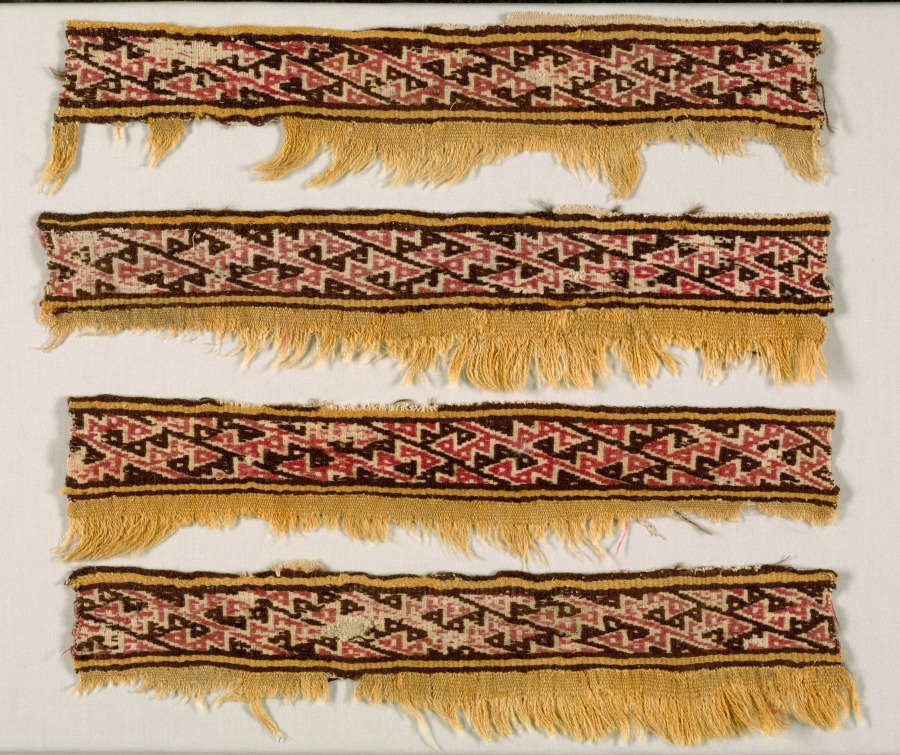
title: Four Border Strips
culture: Peru, Central Coast, Chancay, 12th-15th century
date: c. 1100–1400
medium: plain compound cloth; cotton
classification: Textile